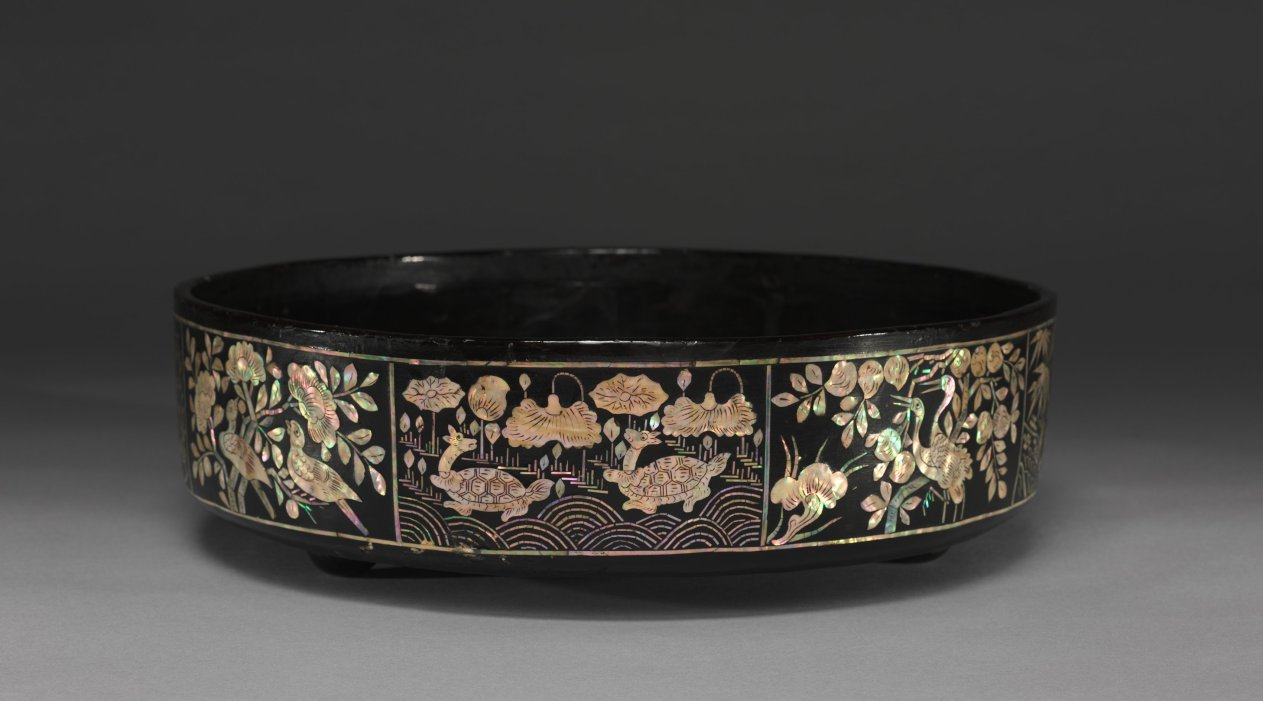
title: Tray for Sewing Tools with Mother-of-Pearl Inlay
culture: Korea, Joseon dynasty (1392–1910)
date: 1800s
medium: lacquer with mother-of-pearl inlay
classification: Lacquer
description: This mother-of-pearl lacquer tray is decorated with various scenes of animals interacting with their natural surroundings. Its flat circular base depicts a pond where a leaping carp and a small school of fish swim below the boughs of a cherry tree. The tray’s exterior wall is densely decorated with various animals paired with plants symbolizing wishful thoughts of longevity, marital happiness, and prosperity.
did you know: Many thin layers of lacquer were applied to the tray's leather core. The design was cut into the dry lacquer and then the mother-of-pearl was inserted.